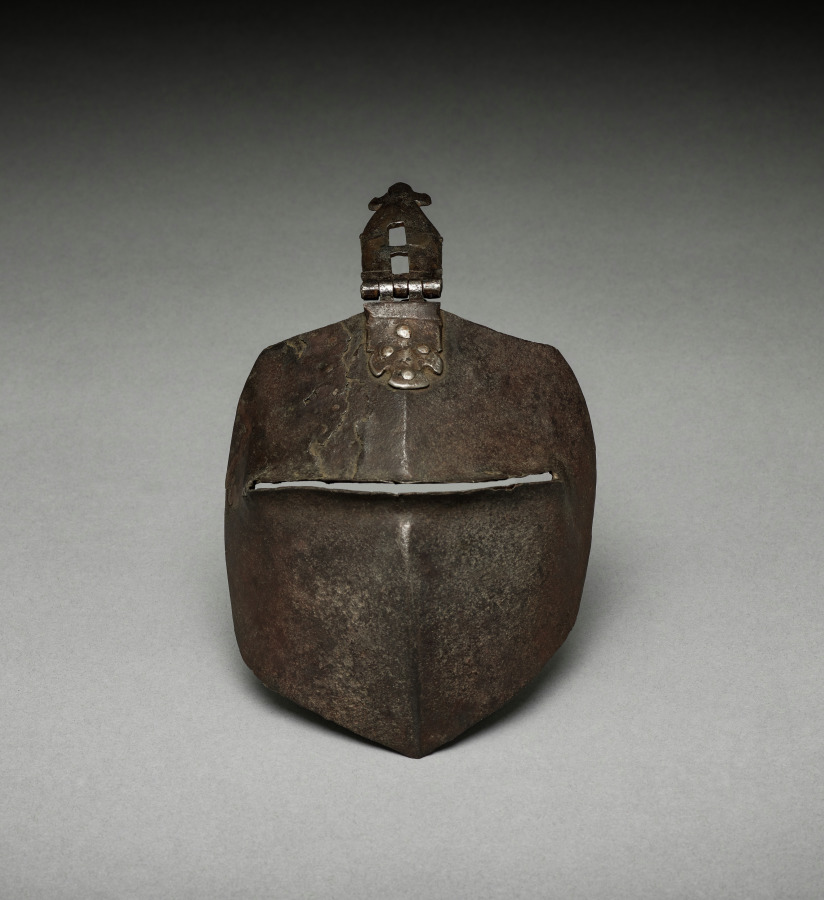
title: Visor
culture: Italy, early 15th Century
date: c. 1400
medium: steel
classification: Arms and Armor